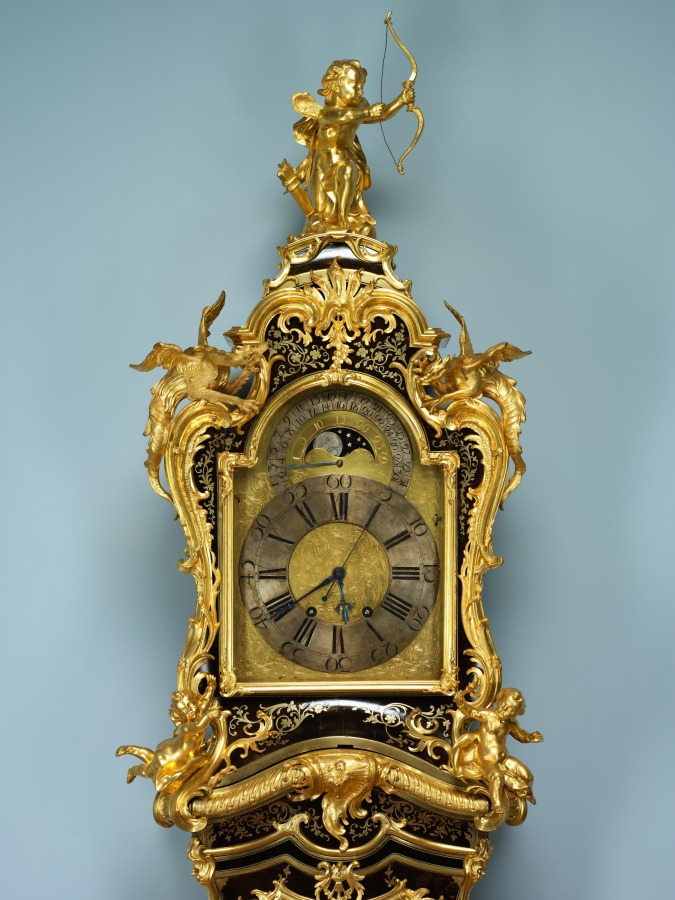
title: Tall- case Clock (Regulateur)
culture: France, Paris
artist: Jean-Pierre Latz (French, 1691–1754)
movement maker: Stollewerck (French)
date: 1744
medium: boulle marquetry with gilt bronze mounts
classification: Furniture and woodwork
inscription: incised on the back of the lowest front panel: .LATZ . A . PARISIIS . FECIT ./. MDCCXLIV; engraved on the clock face: Stollewerck/Paris.